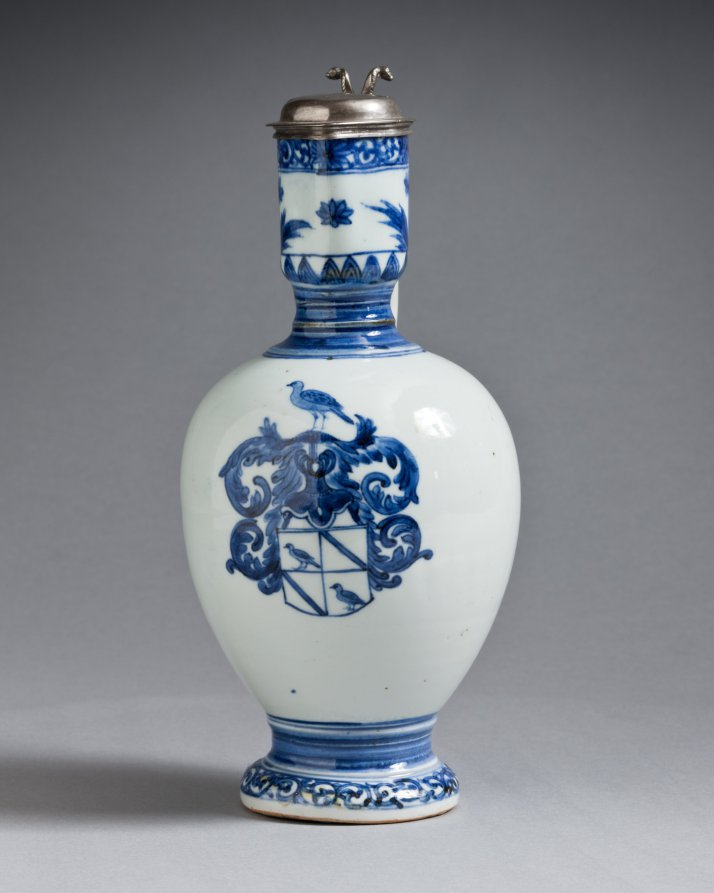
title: Jug with Silver Mounts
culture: Japan, Edo period (1615–1868)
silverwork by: Barent van Leeuwen (Dutch, 1637–1682)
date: c. 1662–76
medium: porcelain with underglaze blue decoration and silver mounts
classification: Ceramic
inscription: [on silver]: town mark for Amsterdam; lion rampant crowned (alloy mark for 0-934 silver); d (date letter for 1666), maker's mark of Barent van Leeuwen.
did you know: The coat of arms on this jug are those of the Valckenier family, active in the Dutch East India Company.